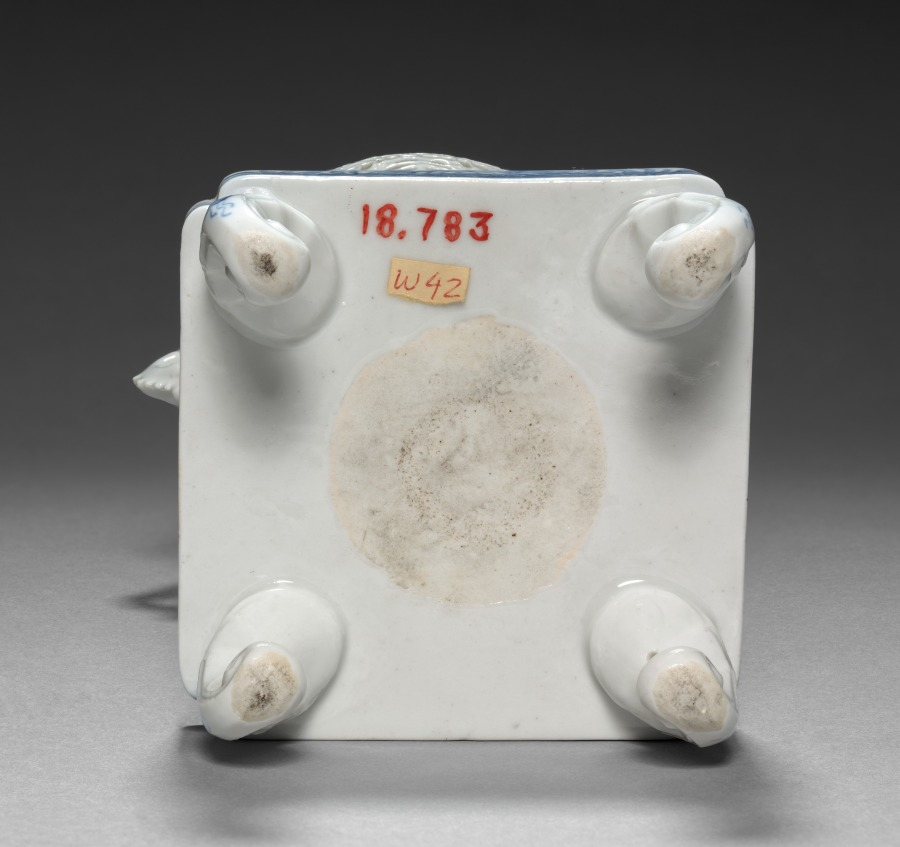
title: Incense Chalice and Cover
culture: Japan, Edo period (1615–1868)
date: 1700s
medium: porcelain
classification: Ceramic